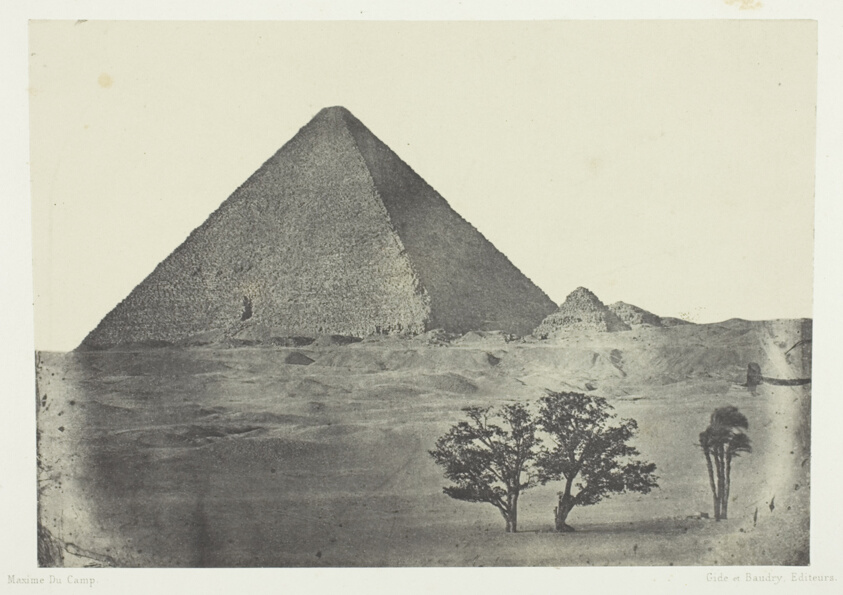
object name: Photograph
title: Pyramide de Chéops, Egypte Moyenne, plate 9 from the album "Egypte, Nubie, Palestine et Syrie" (1852)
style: 19th century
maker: Aimé Rochas (French, 19th century)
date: 1849/51, printed 1852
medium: Salted paper print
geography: France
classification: salted paper print; photographic process; photography; photograph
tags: Collected by Hugh Edwards, Egypte, Nubie, Palestine et Syrie